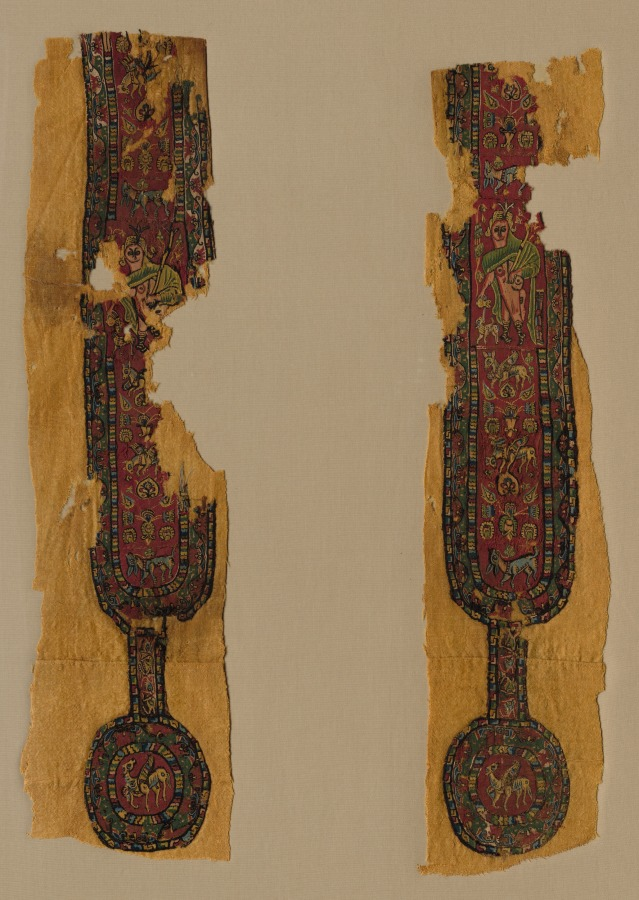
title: Decorations and Sleeve from a Tunic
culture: Egypt, Umayyad period (661–750) or Abbasid period (750–1258)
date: 700s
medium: wool; plain weave with slit-tapestry weave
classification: Textile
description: Figures and winged animals from ancient Greece and Rome remained popular during the early Islamic period of the Umayyad and Abbasid dynasties. The naked figure could represent Dionysus, the Greek god of wine; he holds his thyrsus, a staff decorated with ivy leaves and pinecones, while pouring liquid from a small jug for the panther. These colorful designs probably adorned the sleeve and front or back of a tunic, a garment worn directly on the body for over 1,000 years, from Roman antiquity to the Middle Ages. Popular decorations were regularly reused and sewn onto new tunics, as can be seen on this winter garment made of wool.